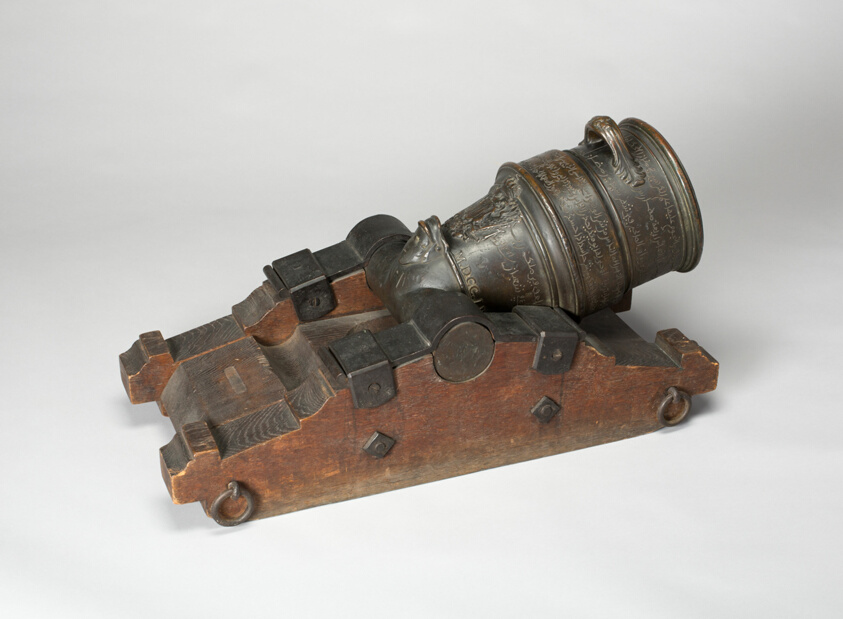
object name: Arms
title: Mortar on Carriage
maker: German, Nuremberg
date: 1753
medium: Bronze, iron, and wood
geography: Nuremberg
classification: firearm-cannon; arms; arms and armor